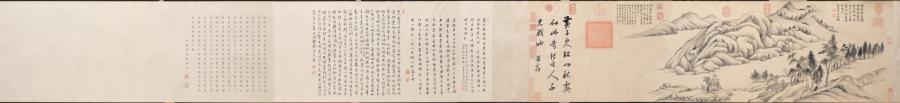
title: River and Mountains on a Clear Autumn Day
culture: China, Ming dynasty (1368–1644)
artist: Dong Qichang (Chinese, 1555–1636)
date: c. 1624–27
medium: Handscroll; ink on Korean paper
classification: Painting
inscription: 黃子久江山秋霽似此，當恨古人不見我也。思翁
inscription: 董文敏每遇高麗鏡面箋，書畫尤為入神。此卷改表紙用之，字跡隱然，兼有朝鮮之印。至於筆法圓秀，真接倪黃。豈文沈所可同日而語也。 康熙庚午中秋後一日，天氣澄爽，重裝初畢，跋於瓶廬。抱瓮翁高士奇。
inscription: Second inscription by Gao Shiqi 高士奇 (1645–1704): On the twenty-third day of the ninth month, the jiaxu year of the Kangxi era [1694], I packed my bags to head north. When my boat passed Wuchang [Suzhou], Mr. Mantang [Song Luo] brought wine to bid me farewell so that we could share our thoughts on our separation in the last few years. I showed him the paintings and calligraphy which I collected and asked his opinions. Since Mr. Mantang does not own any handscrolls by Wenmin [Dong Qichang], I leave this one for him in commemoration of our parting; thus the painting will have a worthy owner and our meeting will become a beautiful story in the future. It is the fourth day after the beginning of winter, with the sky clear and sober. Trees under frost have turned red and yellow, seemingly echoing the brush and ink in the painting. I also ask Mr. Mantang to inscribe a poem to commemorate our meeting so that it will survive forever.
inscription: 1 colophon and 4 seals of Song Luo 宋犖 (1634–1713): Who is the foremost art connoisseur of our dynasty?/ Tangcun [Liang Qingbiao, 1620–1691] is dead, so the title passes to Jiangcun [Gao Shiqi]./ Leaving office, you retired for five years in the Lake region./ Fondling handscrolls and hanging scrolls from morning to evening./ You sent me your collection catalogue Xiao Xia Lu last year;/ It is indeed the true equal of [Zhou Mi's] Yun Yan Guo Yan./ This year you returned to the capital by imperial order;/ Your boat with calligraphy and paintings anchored at the river bank in Suzhou./ When we met each other you did not waste any time for conversation by poured out immediately/ From your "coral net" extraordinary treasures./ You produced incomparable scrolls, with gold-inscribed labels and jade rollers,/ Pouring out from bags and trunks, they were spread in disarray./ Without a word, I rolled and unrolled until my fingers were numbed,/ We sat straight, facing each other quietly, and never felt tired./ For three days we forgot about sleeping and food./ And at times we shouted our joy out loud, forgetting who is host or guest./ Your Dwelling in the Fuchun Mountains and the Yuansheng manuscript/ These peerless works I myself examined with delight./ As an added pleasure to the farewell dinner under the Maple Bridge,/ You allowed me to hold again this handscroll by Dong Qichang--/ The Misty River and Piled Peaks [by Zhao Mengfu] and this Clear Autumn Day are two extraordinary masterpieces./ In showing such life and spirit with "qi yun." the artists were truly "men of heaven."/ The Clear Autumn Day is not even three feet long,/ Painted on tributary Korean paper, it shines like silver./ Every building up and every turn of the mountains imitates nature,/ Every tree and every rock is removed from the commonplace./ From the beginning, the theory of poetry is the theory of painting,/ Like the lotus and the morning sunshine, they complement and refresh each other./ The artist's inscription regrets that "the Old Masters cannot see my scroll."/ Huang Gongwang would have agreed in his grave./ The vermilion of the seals glitter and dazzles the eyes,/ These added accessories are as valuable as jade./ You are very kind to give it to me,/ The feelings expressed in your inscription are so sincere./ Wanting to refuse, but unable, I accept it to respect your wish,/ And taking off my gown and cap I wrapped it with care./ You asked me to write a long poem in commemoration of this beautiful occasion,/ I am too ashamed that my effort in response is so poor and inadequate./ Returning home, I unrolled it under candlelight, trying to write the colophon,/ The light of the waning moon shines at the foot of the mossy wall./ Earnestly humming and brows knit in deep thought, I try to compose;/ The verses are not outstanding, but the facts are real./ With this poem recorded at the end of the scroll, I mail it to you for approval,/ This poem and this painting shall outlast a thousand springs. (Translation by LYSL/HK/WKH)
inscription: 1 colophon and 2 seals of Shao Changheng 邵長蘅 (1637–1704); 2 inscriptions and 14 seals of the Qianlong 乾隆 emperor (r. 1736–95); 1 seal of the Jiaqing 嘉慶 emperor (r. 1796–1820); 3 seals of the Xuantong 宣統 emperor (r. 1908–11); 1 seal unidentified.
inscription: [印] 朝鮮國王之印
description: Dong Qichang had a tremendous impact on the artistic practices and historiography of later generations; his works and writings shaped literati aesthetics. Here, Dong places an abstract landscape composition diagonally across the picture plane, configured to recall earlier masters and simultaneously express his own personal style. Dong’s inscription claims, Huang Gongwang’s Autumn Day, looks like this. I truly regret the master has not seen my work. In fact, Dong Qichang may have had Dong Yuan’s Xiao and Xiang Rivers in mind, a work he owned and considered a key work in Chinese art history.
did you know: The painting has an imprint of a Korean seal that reads "Seal of the king of Joseon."